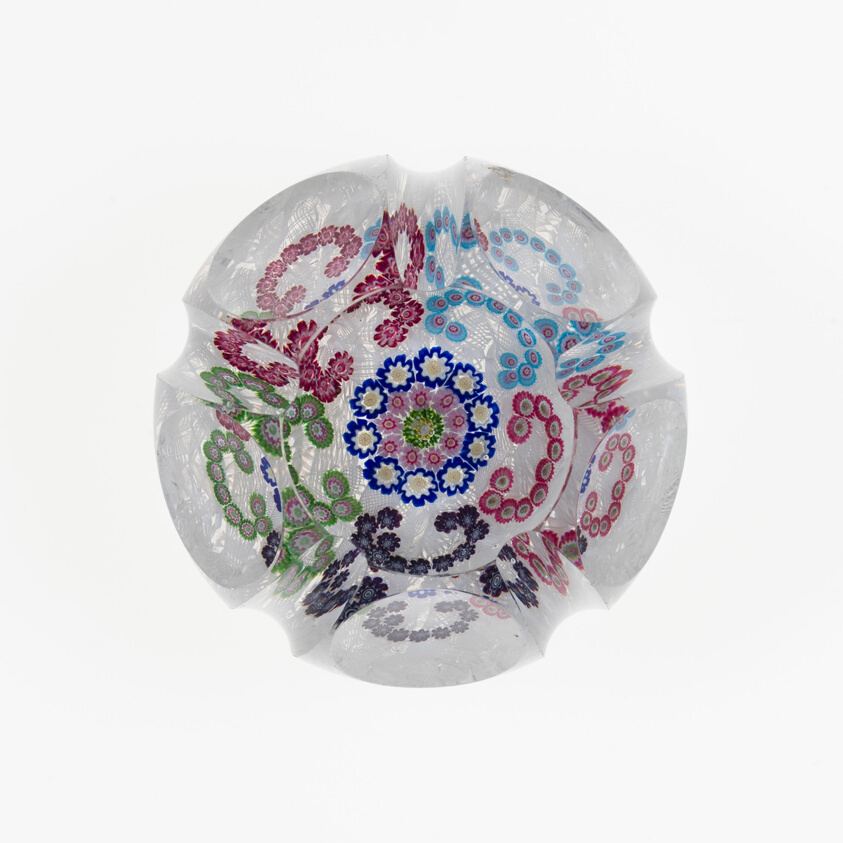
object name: Glass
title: Paperweight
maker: Clichy Glassworks (Cristalleries de Clichy); Clichy, France, 1837-1885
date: c. 1845–55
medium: Glass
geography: Clichy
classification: paperweight; millefiori; european decorative arts; glass